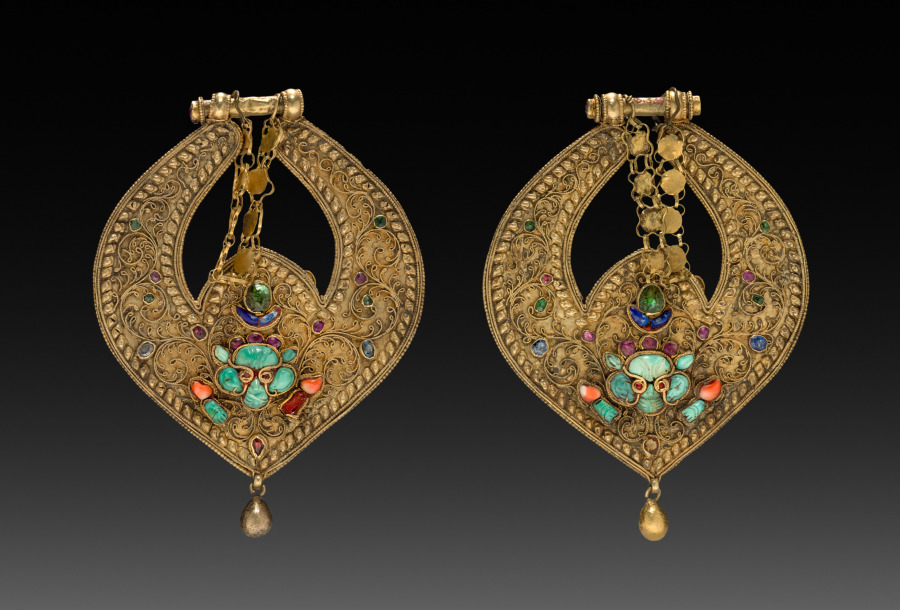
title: Pair of Deity Earrings with Vishnu on Garuda (front) and chepu (monster mask) (back)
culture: Nepal, Kathmandu Valley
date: 1600s or 1700s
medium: Gold set with precious and semi-precious stones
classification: Jewelry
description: A green Vishnu with four arms, each holding his attributes of discus (his upper right hand), mace (upper left), lotus (lower right), and conch (in pearl, lower left) rides on a coral Garuda with lapis wings, arms outstretched. The blue figures on either side are probably celestial beings praising him in dance postures, with one leg crossed over the other. On the back sides, delicate filigree floral scrolls form the backdrop of a protective mask popular in the Nepal; a sun over a crescent moon are inlaid above his head.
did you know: These larger-than-life earrings would hang on a deity statue in a Nepalese temple, rather than worn by a person.